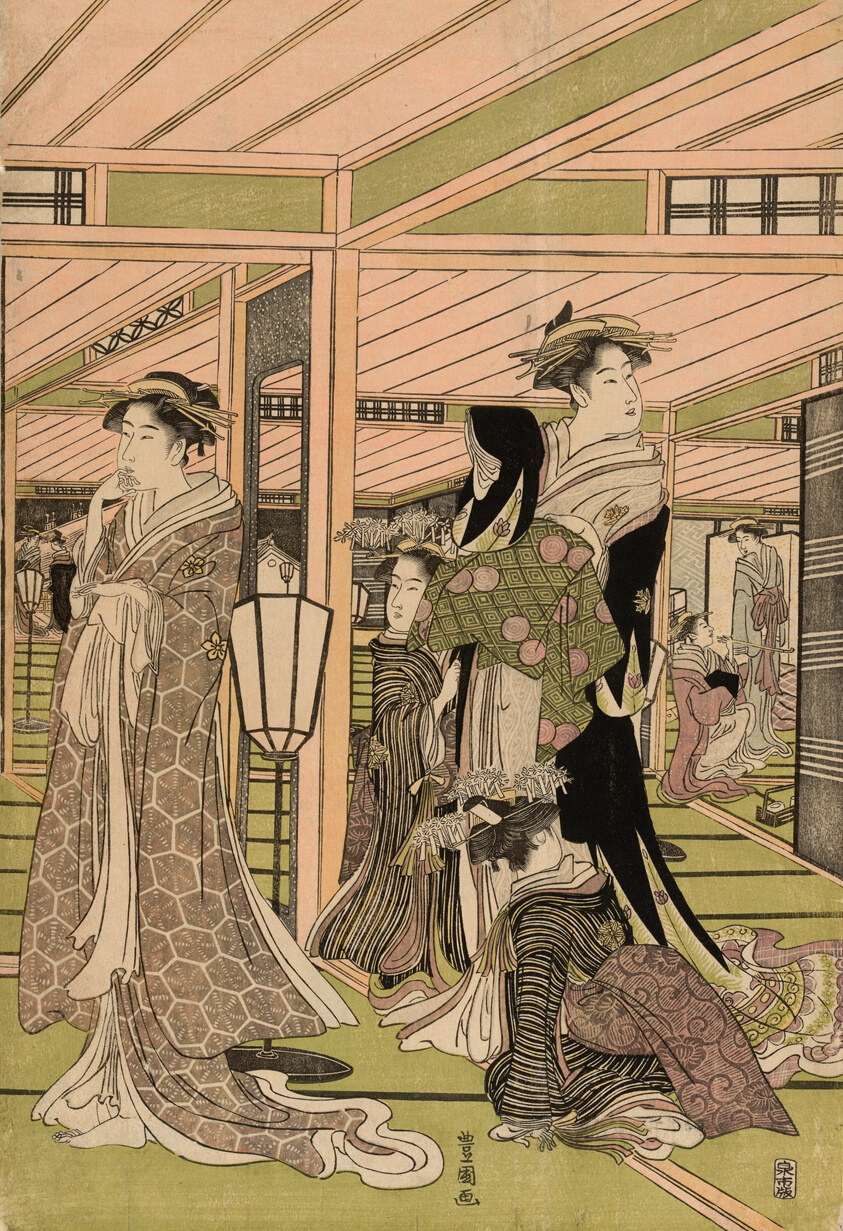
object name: Print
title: The parlor of a brothel in the pleasure quarters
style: Japanese (culture or style)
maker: Utagawa Toyokuni I 初代 歌川 豊国; Japanese, 1769–1825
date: c. 1789/1801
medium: Color woodblock print; right sheet of oban triptych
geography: Japan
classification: woodblock print; print; asian art